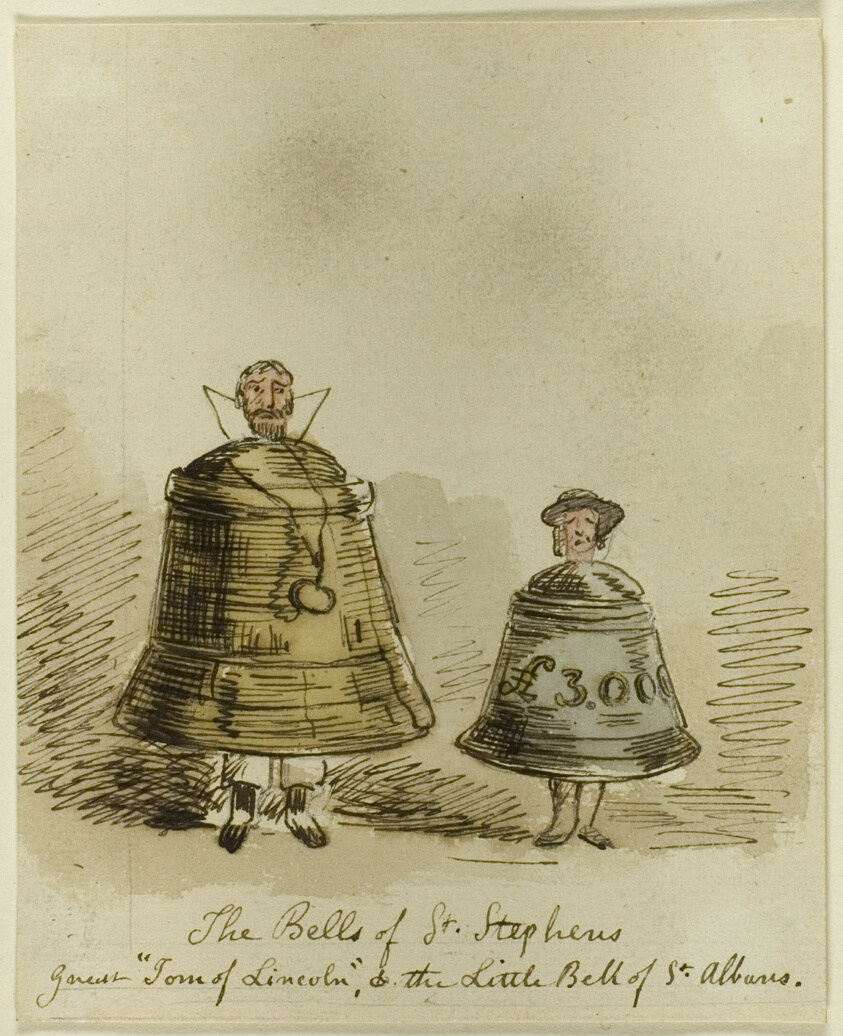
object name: Drawing and Watercolor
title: The Bells of Saint Stephens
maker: John Leech (English, 1817-1864)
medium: Watercolor and pen and brown ink, over graphite, on cream wove paper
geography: England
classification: watercolor; drawings (visual works); prints and drawing